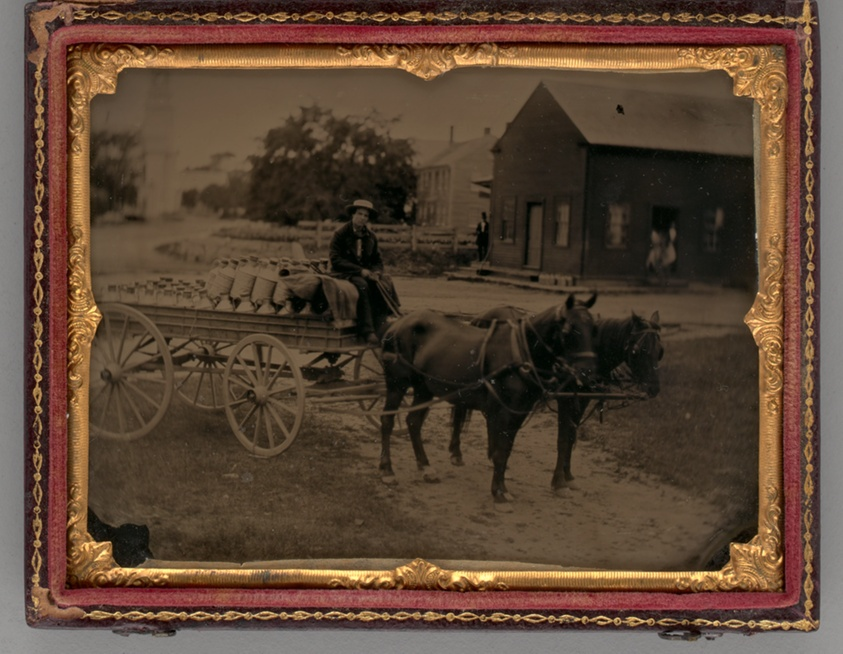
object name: Photograph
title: Untitled (Portrait of a Man Seated on top of a Horse-Drawn Carriage)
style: 19th century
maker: Unknown maker; American, 19th century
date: 1859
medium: Ambrotype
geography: United States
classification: portrait; portrait; photography; photographic process; photograph; ambrotype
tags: lundberg collection, horse-drawn carriage, horses, portrait, portraits, people, animals, horse